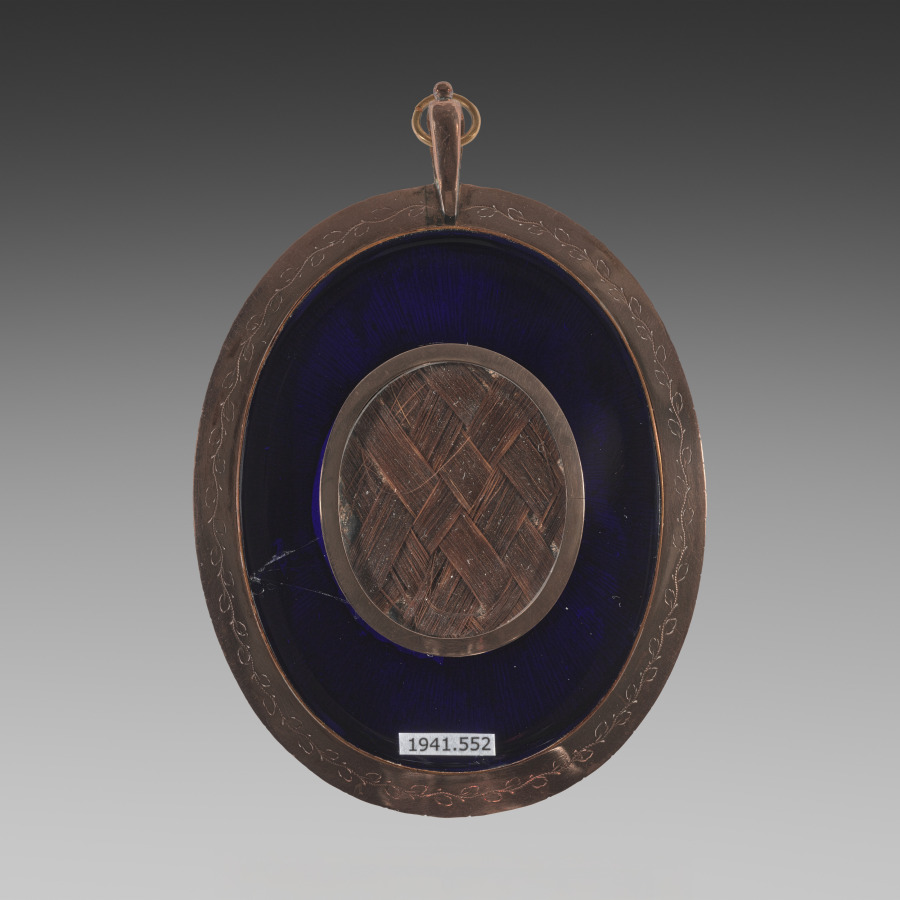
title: Portrait of Catherine Clemens and Her Son, John Marcus Clemens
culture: England, 19th century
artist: Richard Cosway (British, 1742–1821)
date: c. 1800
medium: watercolor on ivory in a gold and split pearl frame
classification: Portrait Miniature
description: This sensitive portrait of Catherine Clemens and her son, John Marcus, was painted around 1800 and exemplifies the prettiness for which Cosway was so well known. The artist’s trademark turquoise blue sky is reflected in the boy’s brilliant blue eyes and the bow on the frock that slips informally off his shoulder. This miniature also showcases Cosway’s mature technique of delicate stipplework throughout the faces, contrasted with looser brushstrokes for the hair and garments. Both John Marcus and his mother are swathed in white ruffled fabric, against which the paleness of their skin seems even more pronounced. Like his contemporaries, Cosway used the bare ivory ground to enhance the creaminess of flesh tones. John Marcus wears a coral necklace, frequently given to children during this period as a talisman believed to ward off illness. His innocent, childish gesture of reaching down his mother’s dress for her breast is awkward considering his disproportionately large size. The fact that he is still young enough to wear a gown rather than breeches suggests that he is under four years old, and yet his head and lips are larger than his mother’s. During the final decades of the eighteenth century, aristocratic women as prominent as the Duchess of Devonshire were electing to breastfeed their children rather than send them to wet nurses, and this may be a delicate reference to Catherine Clemens’s philosophy of “natural” parenting.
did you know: Portraits of mothers with their children were much more common in the 1700s and 1800s in Britain than were portraits of fathers with their children.